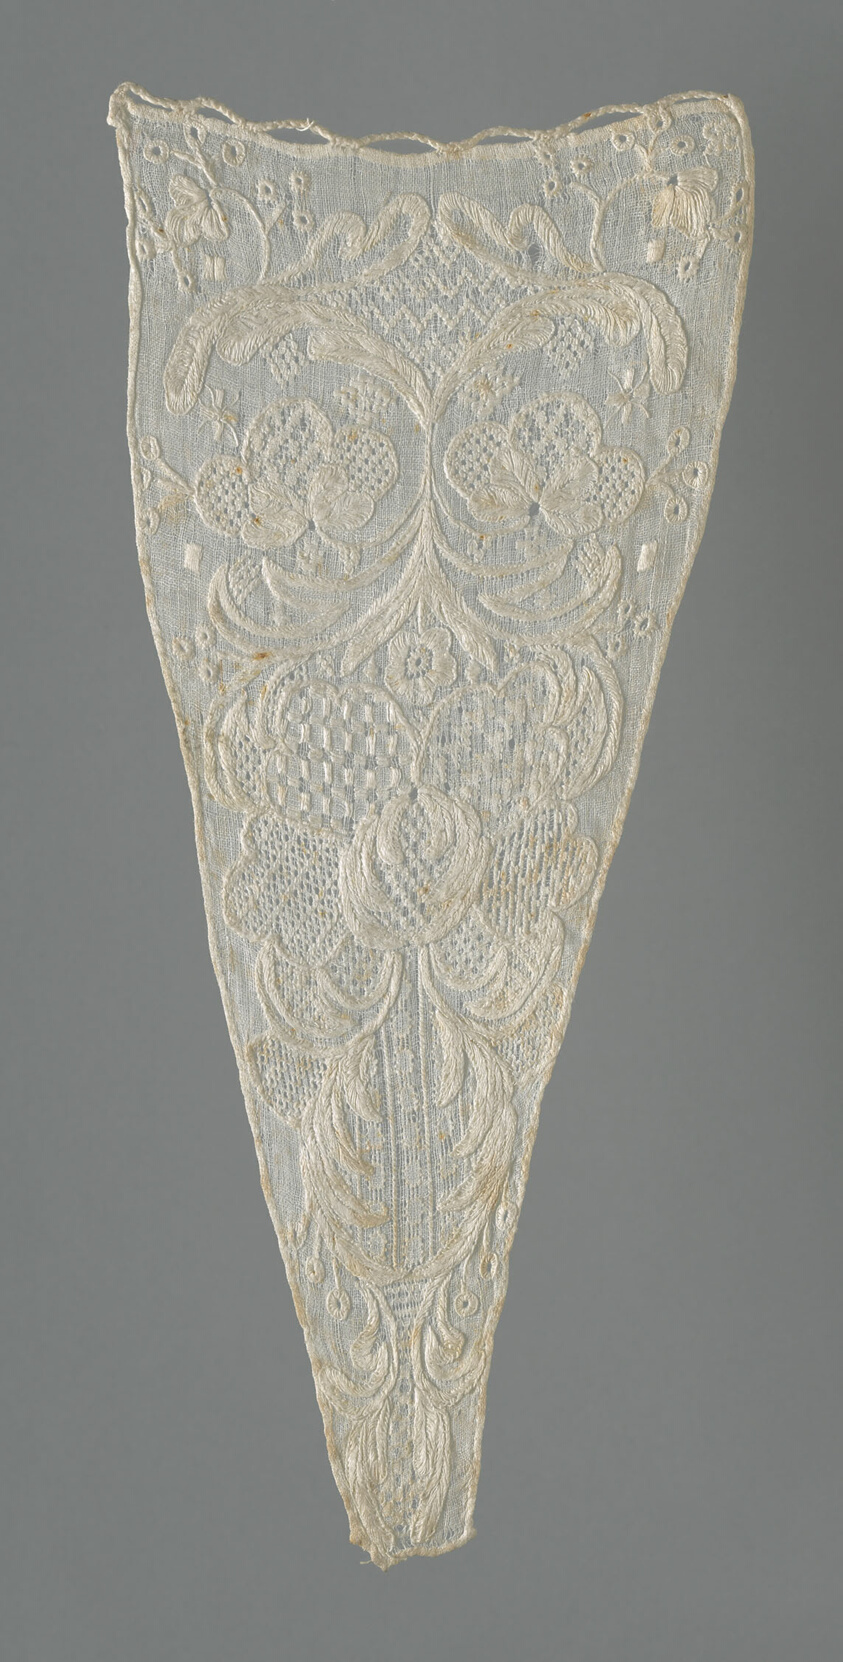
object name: Textile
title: Stomacher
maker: France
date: 19th century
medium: Linen, plain weave; pulled threadwork embroidered with linen yarns in black, buttonhole, interlocking lace, overcast, satin, single faggot, and stem stitches; attached cord of 8-strand, 4-sided braid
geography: France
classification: textile; costume; needlework (visual works)